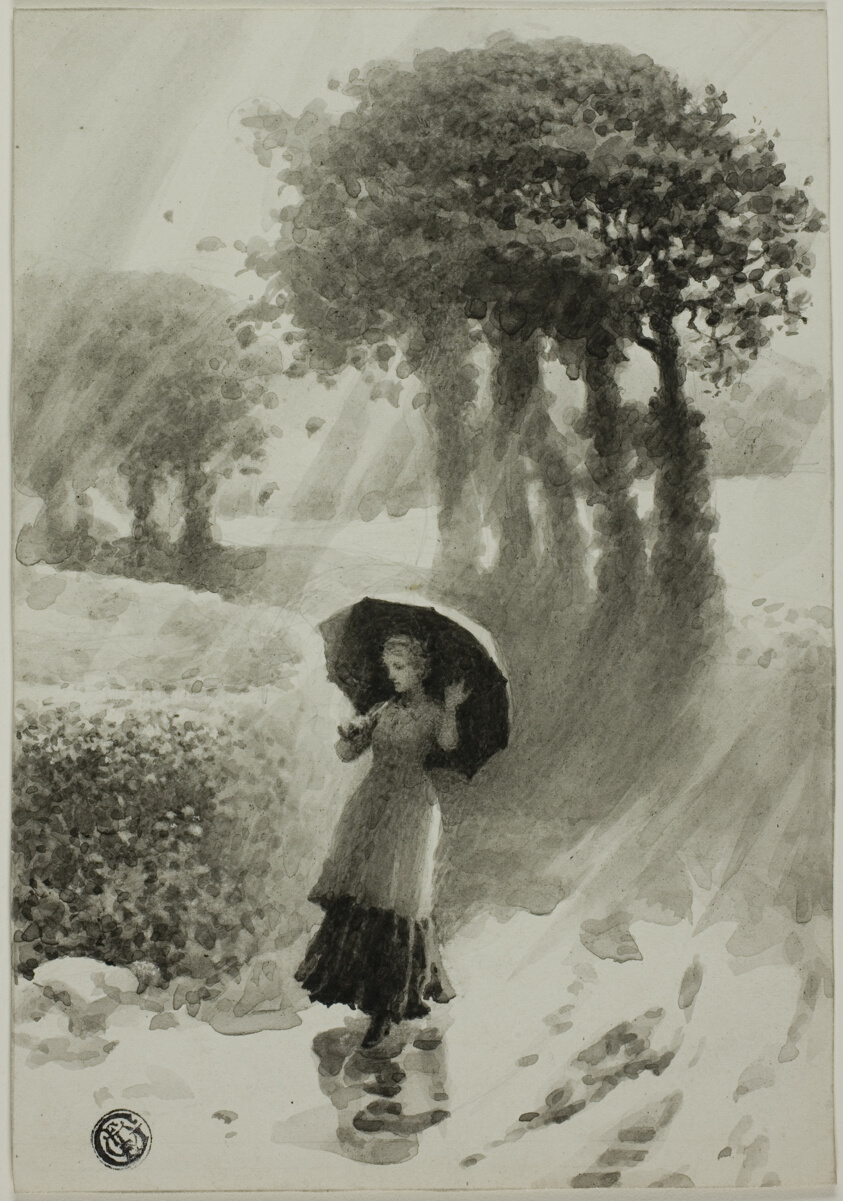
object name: Drawing and Watercolor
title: Summer Shower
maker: Alfred Sacheverel Coke (English, active 1869-1892)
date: 1875/99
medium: Brush and black and gray wash, over graphite, on off-white wove card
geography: England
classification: ink or chalk wash; drawings (visual works); prints and drawing